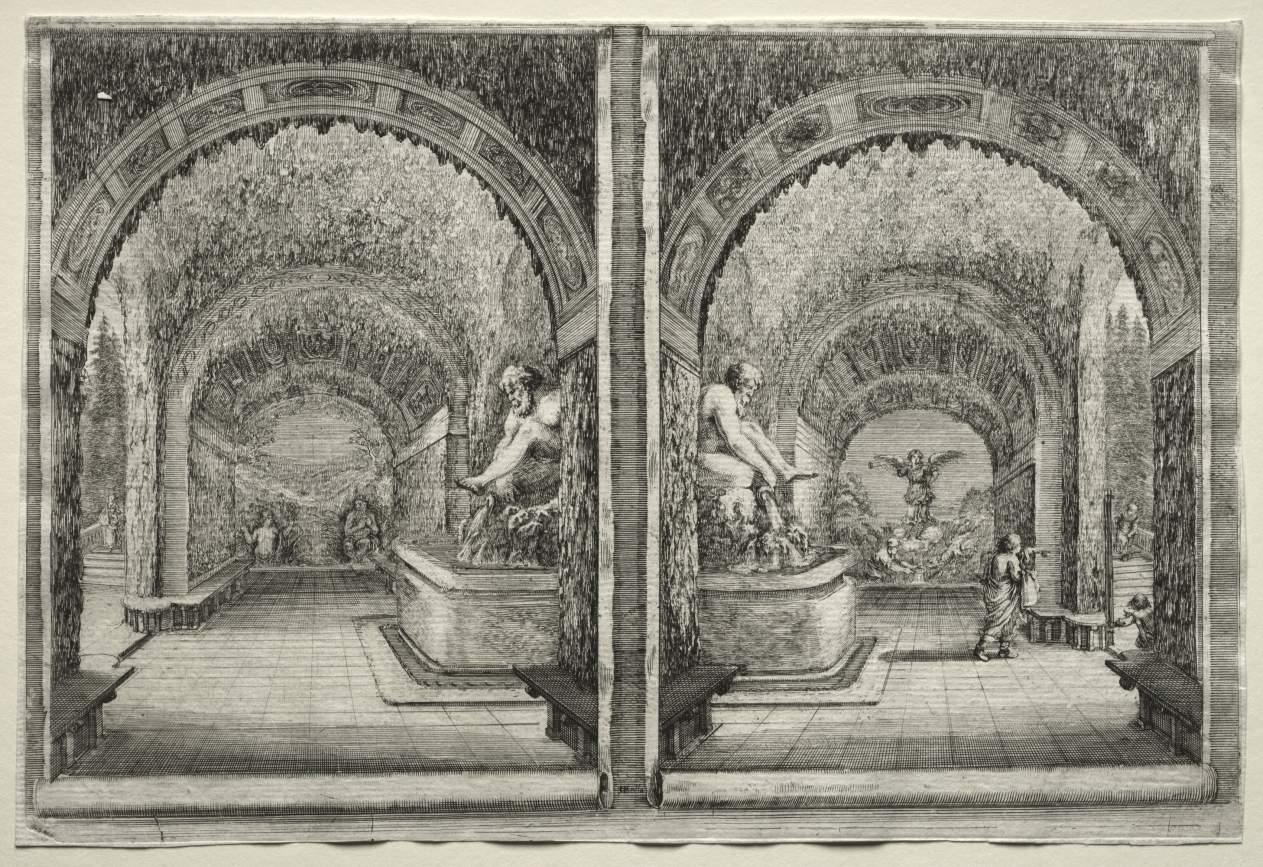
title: Views of the Villa of Pratolino: Two Views of the Grotto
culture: Italy, 17th century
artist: Stefano Della Bella (Italian, 1610–1664)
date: c. 1653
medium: etching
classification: Print